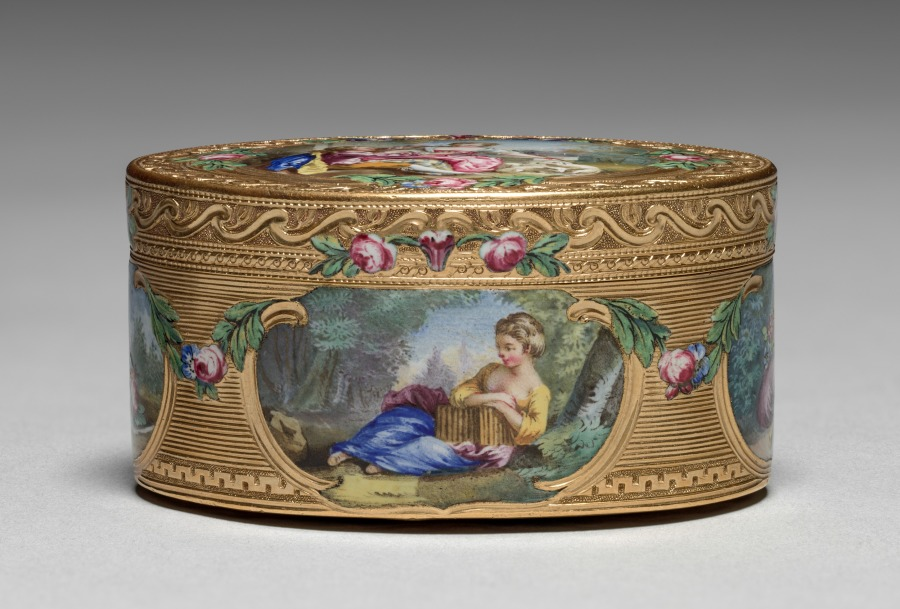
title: Snuff Box (Tabatière)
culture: France, 18th century (style of Louis XV)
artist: Francois Guillaume Tiron (French)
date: 1761–62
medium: gold and enamel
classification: Miscellaneous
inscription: [Maker's mark of Francois-Guillaume Tiron, master goldsmith in 1747, inside cover]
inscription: [Warden's mark, Paris, 1761-1762, inside cover]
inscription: [Charge mark of Eloi Brichard and Etienne Somfoye, Paris, 1756-1762, inside cover]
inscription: [Maker's mark of Francois-Guillaume Tiron, inside bottom]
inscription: [Warden's mark, 1761-1762, inside bottom]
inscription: [Charge mark of Brichard and Somfoye, inside bottom]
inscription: [Maker's mark of FG Tiron, left wall]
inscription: [Charge mark of Brichard and Somfoye, left wall]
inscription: [Warden's mark, Paris, 1761-1762, left wall]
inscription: [Discharge mark of J.J. Prevost, Paris, 1762-1768, bezel at right]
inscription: [Engraved number, maybe retailer's number]: "n. 13676"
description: The pastoral scenes that decorate this box are typical of the style of François Boucher, a celebrated painter of the period whose works were popularly reproduced on decorative arts. Snuff boxes, used practically as containers for powdered tobacco, were often decorated with miniature reproductions of notable works. The miniature on the cover is inspired by Boucher’s The Galant Pastor (Le Pasteur Gallant) (1738) and that on the bottom by The Amusement of the Shepherd Girl (L’Amusement de la Bergère) (1700s).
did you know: François Boucher was a favorite of the French royal court of Louis XV and named first painter of the king in 1765.